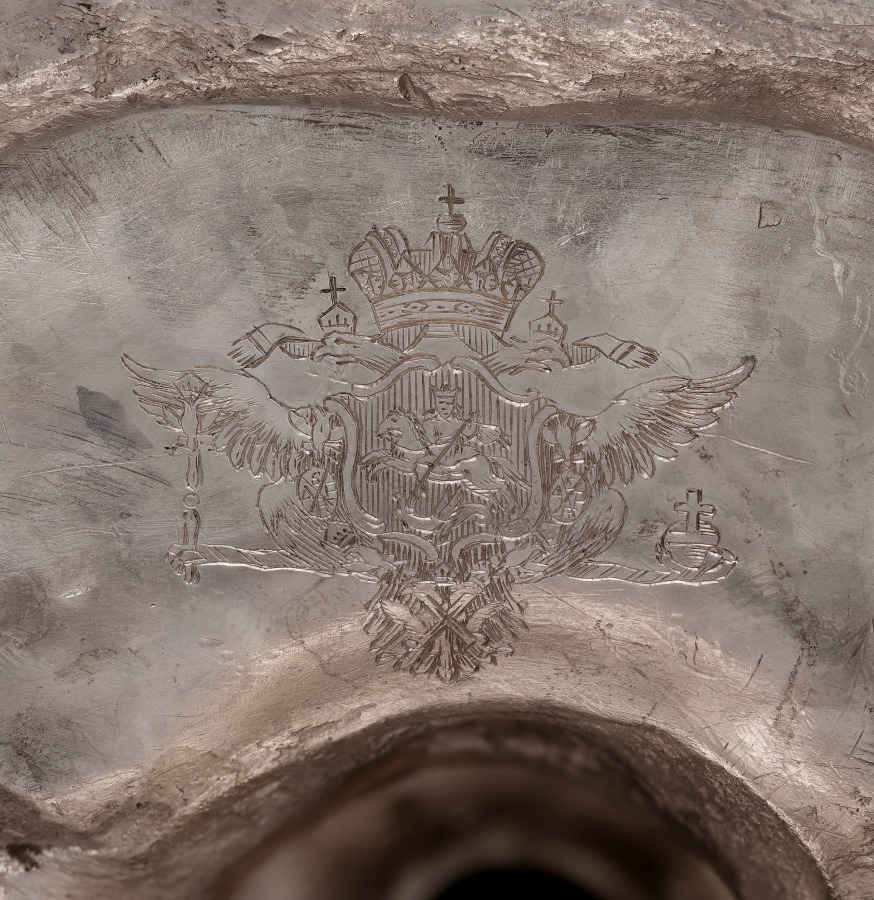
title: Candelabrum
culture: France, Paris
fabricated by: François Thomas Germain (French, 1726–1791)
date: 1757–1758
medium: silver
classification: Silver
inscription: [Maker’s mark of Francois-Thomas Germain, beneath base]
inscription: [Charge mark of Eloy Brichard, 1756−1762, beneath base]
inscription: [Warden's mark For Paris, 1757−1758, beneath base]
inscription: [Discharge mark for work intended for export, 1756−1775, beneath base]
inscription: [Discharge mark for work intended for export, 1756−1775, on base]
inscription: [Hallmarks for Saint Petersburg, on base]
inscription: [Assay mark of Ivan Frolov, on base]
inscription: [Russian standard of the French silver, on base]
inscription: [Maker’s mark of Francois-Thomas Germain, master silversmith on October 16, 1748, beneath drip pan of each three bobeches]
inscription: [Charge Mark Of Eloy Brichard, 1756−1762, beneath drip pan of each three bobeches]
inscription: [Discharge mark for work intended for export, probably 1733−1775, beneath drip pan of each three bobeches]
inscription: [Warden's mark for Paris, 1757-1758, beneath drip pan of each three bobeches]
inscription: [Russian standard of the French silver, beneath drip pan of one of three bobeches]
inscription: [Assay mark of Ivan Frolov, beneath drip pan of one of three bobeches]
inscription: [Charge mark for large work of Eloy Brichard, 1756−1762, on bayonet attachment of candelabra]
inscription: [Warden's mark for Paris, 1757-1758, on bayonet attachment of candelabra]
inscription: [Illegible mark in a square, on one bobeche]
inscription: [Engraved beneath base]: “Fait. Par. F. T. Germain. Sculp[teu]r. Orf[ev]re. Du Roy. Aux. Galleries. Du Louvre. A Paris- 1758”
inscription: [Engraved beneath base]: "Du no. 31"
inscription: [Beneath base]:"No 463"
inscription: [Russian Imperial Coat-of-arms, engraved beneath base]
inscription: [Modern inscription with black ink, beneath base]: "L5 ... 51/w-8"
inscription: [Modern inscription (illegible) in a rectangular paper label on the base, engraved. Cipher composed with two “M”’s (?) surmounted by a royal crown]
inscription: [Engraved on candelabra bayonet attachment]: "No 463"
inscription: [On candelabra bayonet attachment]: "du No 31"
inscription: [Engraved cipher with two "M"s (?) surmounted by a royal crown, on one bobeche]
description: This candelabrum is part of a pair. Its design blurs the line between function and decoration. The arms twist and curve, visually flower stems while physically supporting the candles. Though this visual unity is typical of the rococo style, the influence of the rising neoclassical style is evident in the allegorical scenes of light that decorate each candelabra’s stem.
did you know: These candelabra are part of a dinner service sent from Paris, France to Saint-Petersburg, Russia in two separate shipments, the first of which contained 270 objects for 8 dozen place settings.